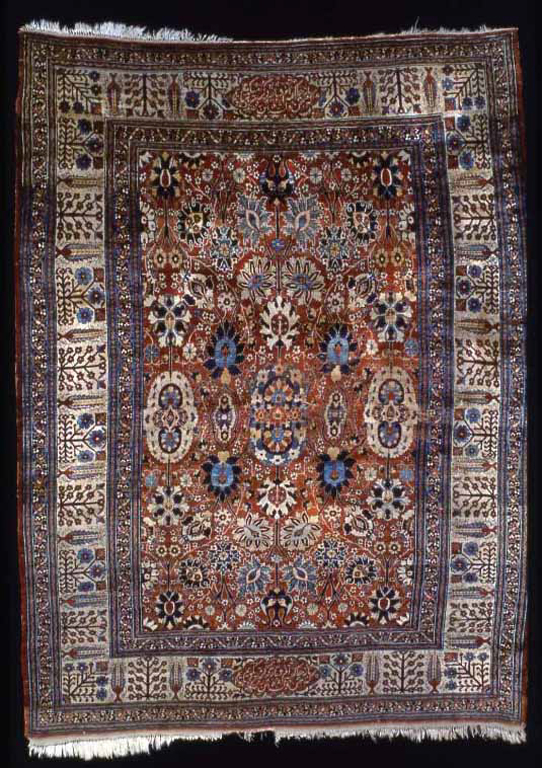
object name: Textile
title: Carpet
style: heriz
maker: Islamic (Persia, Heriz)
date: c. 1875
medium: Silk, plain weave with supplementary wrapping wefts forming cut pile through a technique known as "Ghiordes knots"; knotted warp fringe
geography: Iran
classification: weaving - carpet; textile